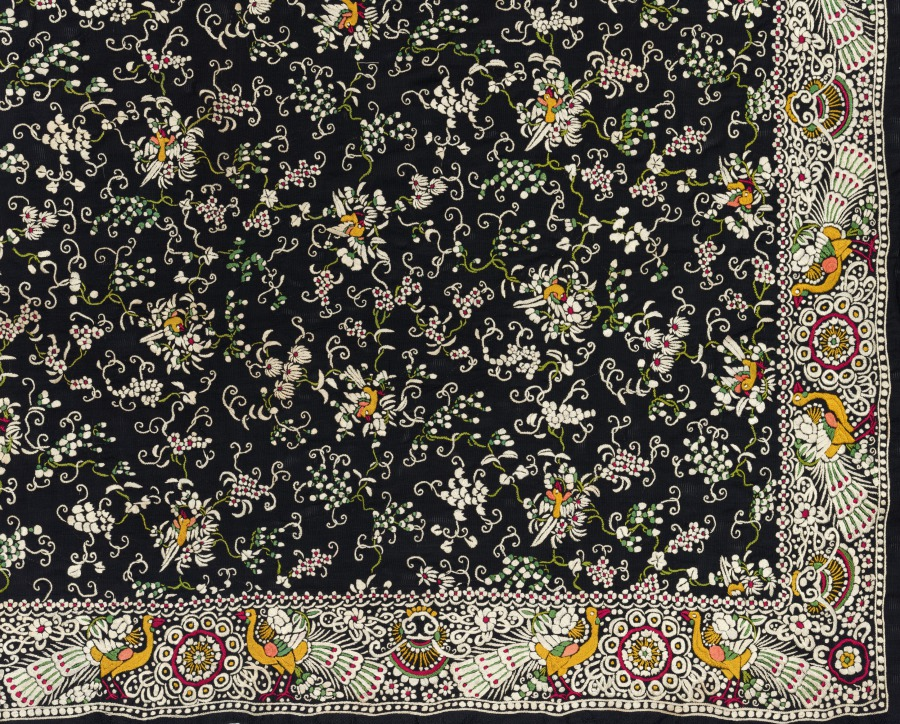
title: Shawl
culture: China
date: early 1900s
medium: embroidery, silk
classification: Embroidery